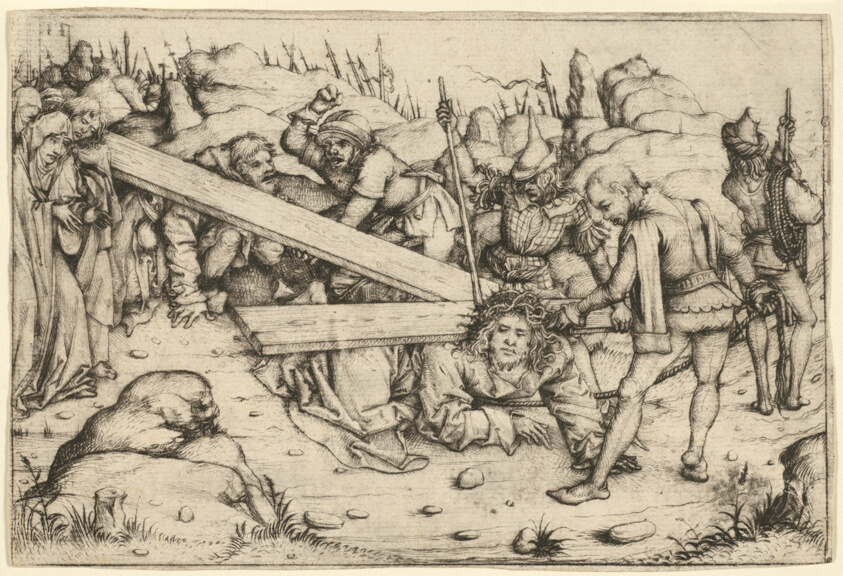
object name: Print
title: The Road to Calvary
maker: Master of the Housebook (German, active c. 1470-1500)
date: 1475/80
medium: Drypoint in black on ivory laid paper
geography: Germany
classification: drypoint; print; prints and drawing; paper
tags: Jesus, Christianity, crucifixions, biblical, religion